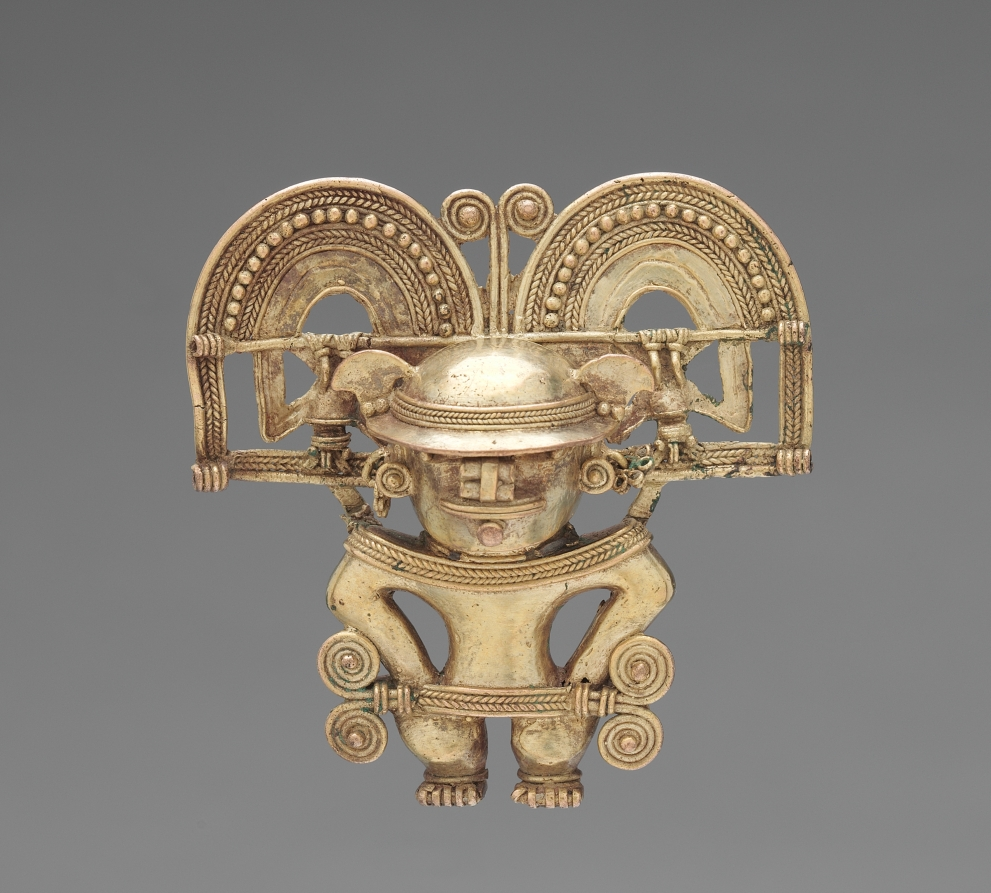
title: Figure Pendant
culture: Colombia, Tairona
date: 900–1550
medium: cast gold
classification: Metalwork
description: Tairona-style pendants are among the most spectacular of all ancient American gold ornaments, in part because of the detail achieved with lost-wax casting. The traits of the figure pendant include a lower lip ornament and a headdress in which two bats hang upside down. Although called caciques (chieftains)-that is, ruler portraits-the meaning of such figures is not well understood. Bird imagery was important in the isthmian region in ancient times and remains so today. For instance, among the modern Bribri of Costa Rica, the principal creator deity (Sibo) takes the form of a buzzard or kite who wears a collar. Collars are standard features of ancient bird pendants, like the one shown here.